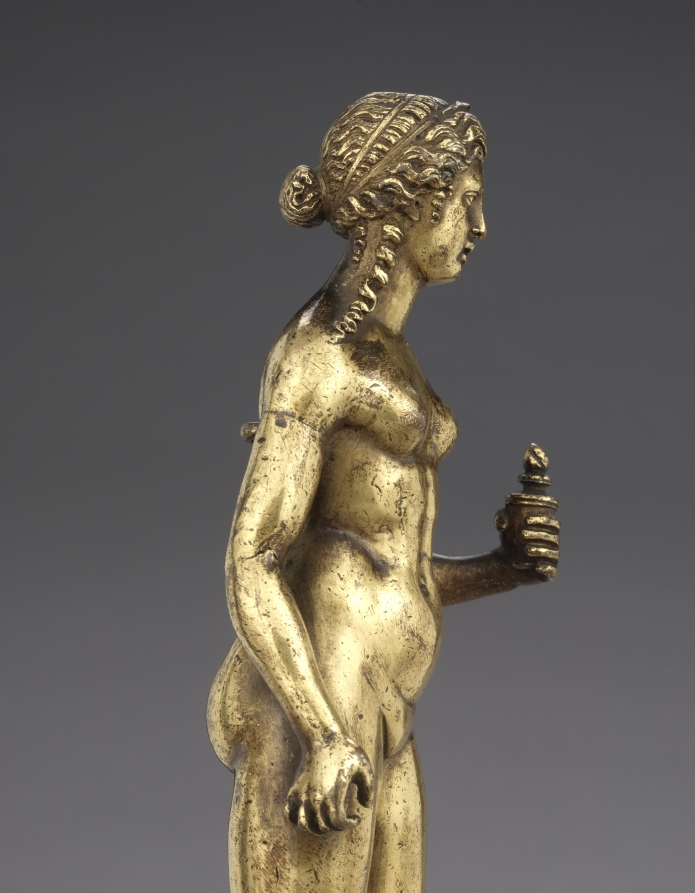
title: Venus with a Burning Urn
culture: Northern Italy, 16th century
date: c. 1500–1520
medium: gilt bronze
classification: Sculpture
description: Venus is the Roman goddess of many virtues, including Love, Charity, Fertility, and Victory. Here, Venus is represented as the goddess of Charity. She wears a crown, as Charity is often depicted as the Queen of the Virtues. The flaming lamp in Venus's left hand was also a symbol of Charity in Venice, where this piece is thought to have originated. The bent fingers of her right hand are bent suggest that Venus may have once held another object. Renaissance sculptors often looked back to antiquity when producing monumental and small bronze statues. The small bronze cabinet piece comes into Italian art during this time, bringing ancient gods and goddesses into Italian households. Venus stands in a contrapposto pose and, like Hellenistic and Roman objects, her locks are tied by a double ribbon while two curls fall on her shoulders. Her tilted head and large emotional eyes, as well as her small nose and parted lips reflect the influence of Hellenistic Greek facial styles.